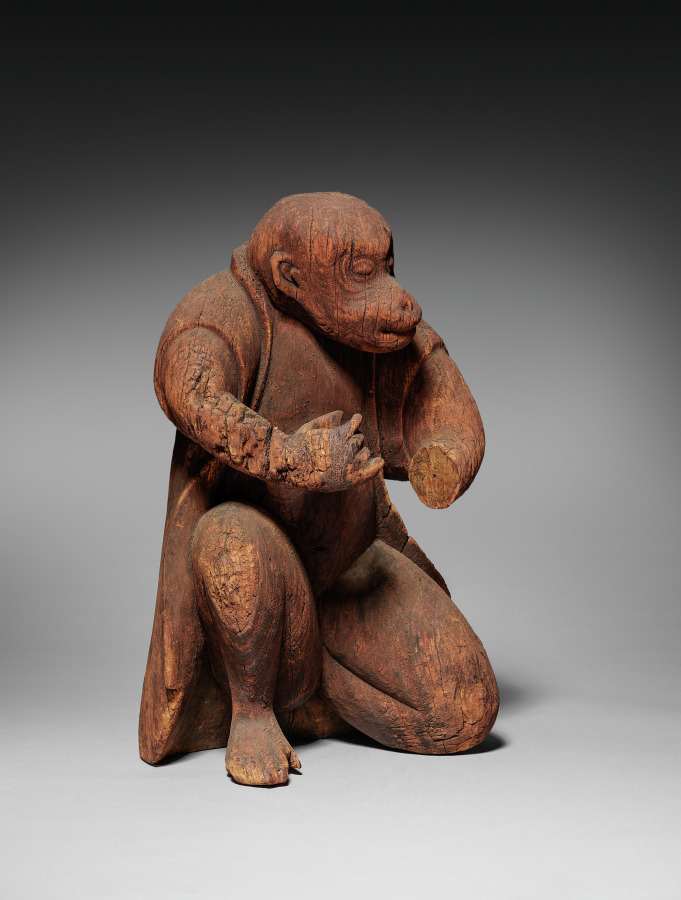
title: Monkey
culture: Japan, Edo period (1615–1868)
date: possibly 1700s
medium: wood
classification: Sculpture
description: Watching monkeys perform was once a popular form of street entertainment in Japan. Monkeys were outfitted with costumes and learned to perform dances and tricks. Monkeys also serve as the messengers of certain kami, or deities, and pairs of clothed monkey sculptures in wood or stone may be found on either side of the entrance of some jinja, or shrines dedicated to kami. This monkey has a jacket and may have once held bells and a fan. Unfortunately, its original identity and purpose have been lost.